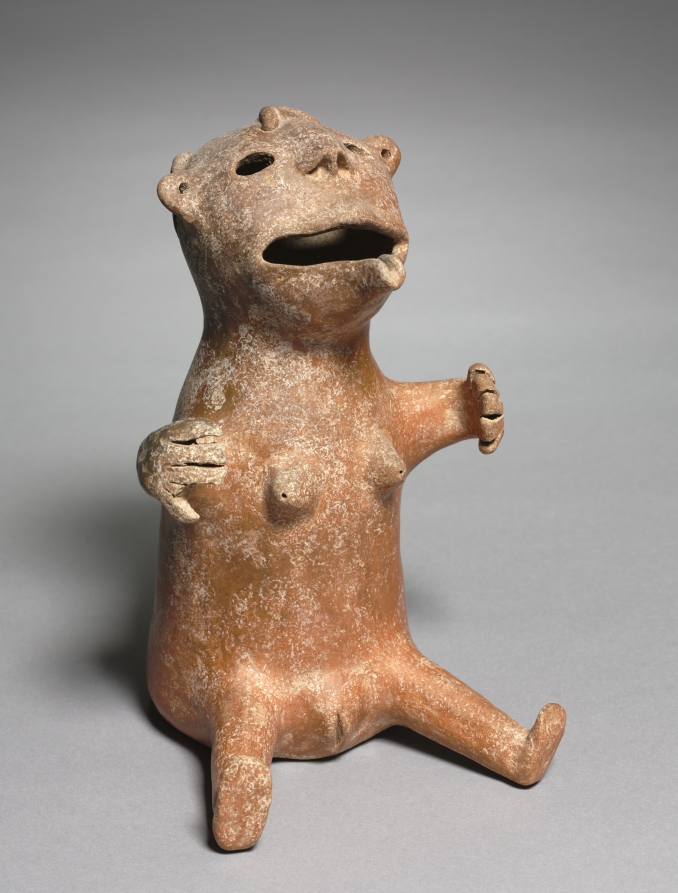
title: "Bear-Woman" Vessel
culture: Iran, Marlik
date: c. 1200–1000 BCE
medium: ceramic, earthenware, burnished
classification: Ceramic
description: The sexual features of this creature have been emphasized so as to guarantee fertility to the woman who drank from it.